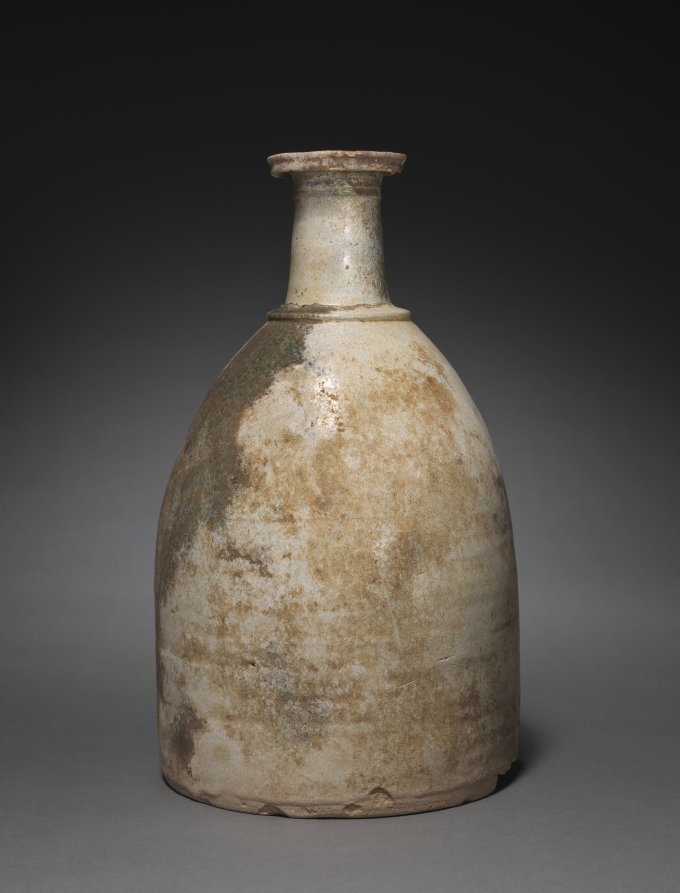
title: Jar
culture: Parthian Empire (247 BCE–224 CE)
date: 1–200 CE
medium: terracotta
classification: Ceramic